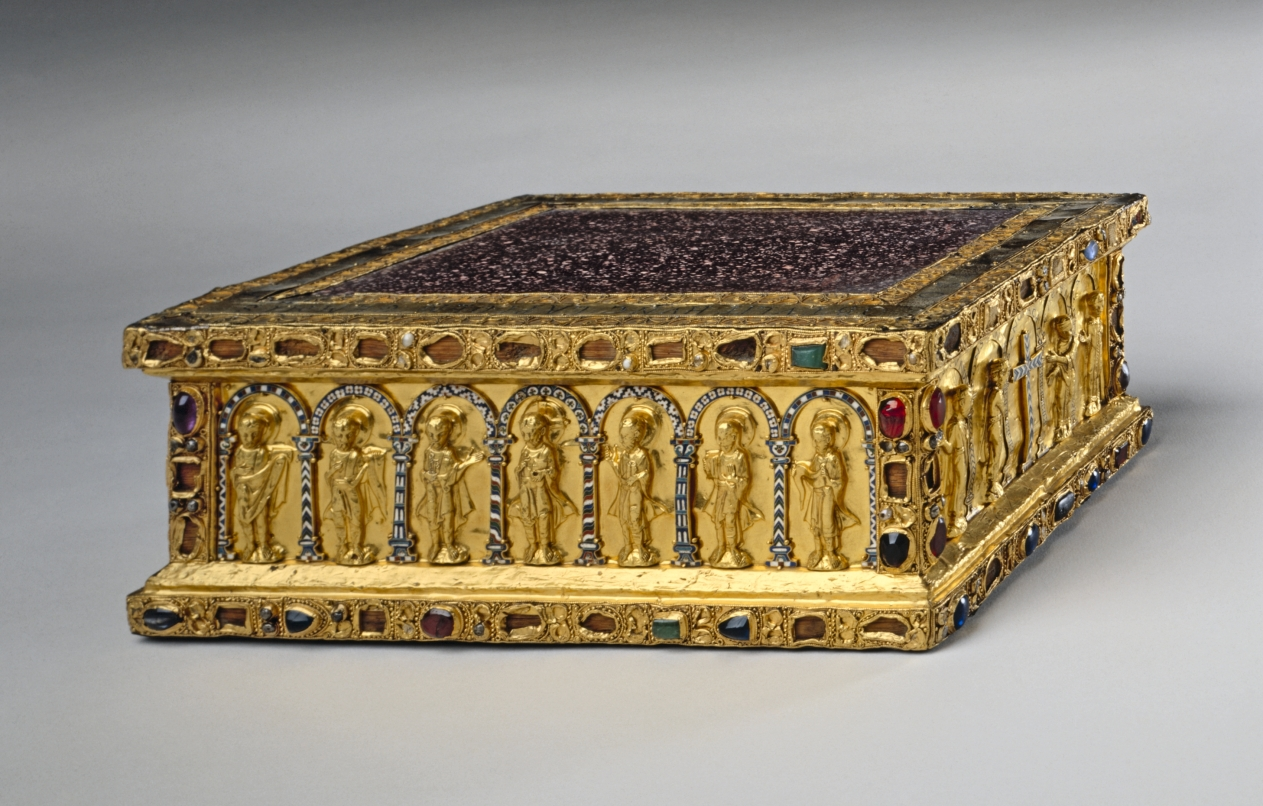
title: Trap door for the Portable Altar of Countess Gertrude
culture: Germany, Lower Saxony?, Romanesque period, 11th century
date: c. 1045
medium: Gold, cloisonné enamel, porphyry, gems, pearls, niello, wood core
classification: Metalwork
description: Commissioned by Countess Gertrude of Brunswick, this portable altar is one of the Guelph Treasure’s earliest and most sumptuous objects. The choice of white-speckled porphyry as the altar stone signals Gertrude’s worldly aspirations; an imperial color since classical antiquity, porphyry was only used by the imperial family. Historical figures of royal and imperial rank are depicted with Christ, the Virgin, apostles, and archangels along the altar’s sides, stressing the countess’s political ambitions and claim of imperial lineage for her own dynasty. The Latin inscription surrounding the altar stone reads, "Gertrude offers to Christ, to live joyfully in him, this stone that glistens with gems and gold."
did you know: By removing this door located on the bottom of the altar, the numerous small relics of saints wrapped in silk are revealed.